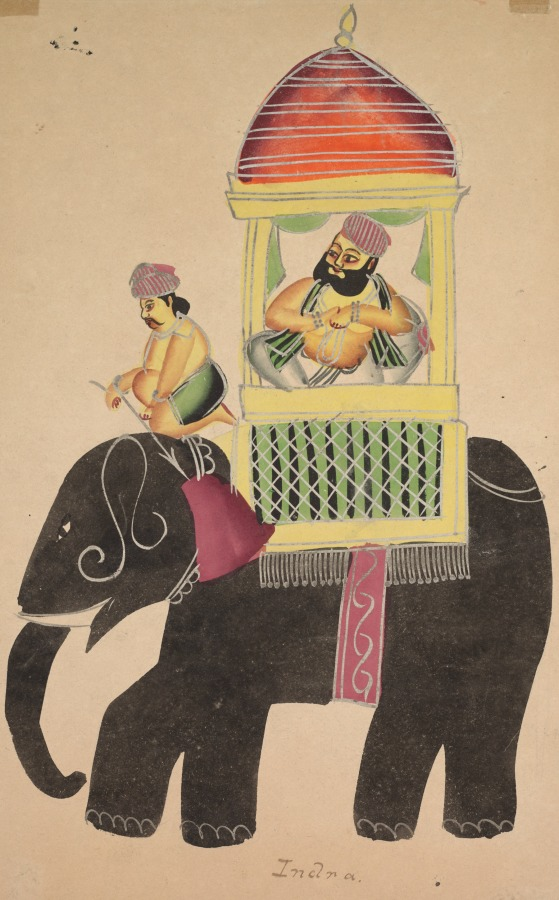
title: Mahant of Tarakeshwar Rides on an Elephant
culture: Eastern India, Bengal, Kolkata, Kalighat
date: c. 1890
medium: Gum tempera, graphite, ink, and tin on paper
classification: Painting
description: The Tarakeshwar murder case of 1873 was a public scandal in Calcutta. It concerned an affair between Elokeshi, a young wife, and the chief priest of the Shiva temple at Tarakeshwar. Having learned about the affair, her jealous husband cut Elokeshi’s throat with a fish knife on May 27, 1873. In the subsequent trial, the husband, Banerji, was sentenced to life imprisonment and the priest was fined and imprisoned for three years. Several Bengali plays and Kalighat images were inspired by this affair and depicted events that did not actually occur but were imagined by the artist. The Mahant (head priest), the adulterer, is here depicted atop an elephant, a symbol of royalty and status. While it is not known whether he actually rode an elephant, his depiction astride one indicates the Mahant’s power and affluence, setting the stage for other images of the scandalous Tarakeshwar murder of 1873.